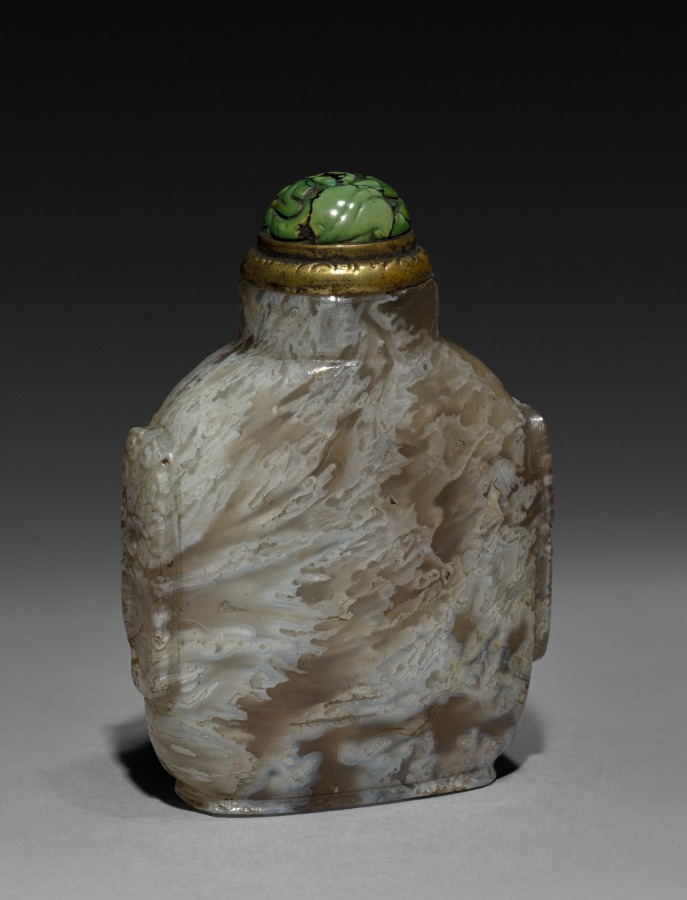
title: Snuff Bottle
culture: China, Qing dynasty (1644-1911)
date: 1644–1911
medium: glass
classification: Glass